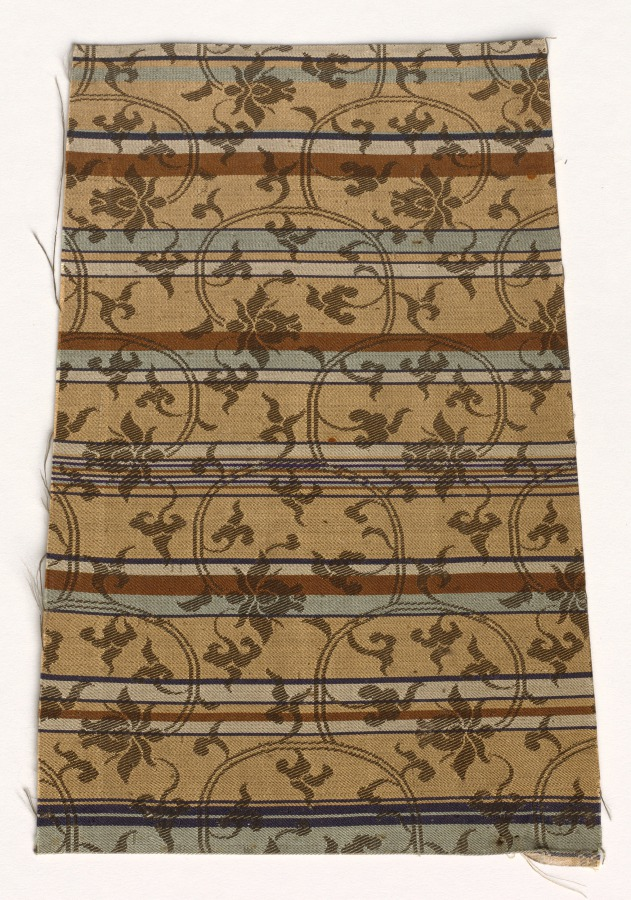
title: Textile Fragment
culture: Japan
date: 1800s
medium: silk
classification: Textile